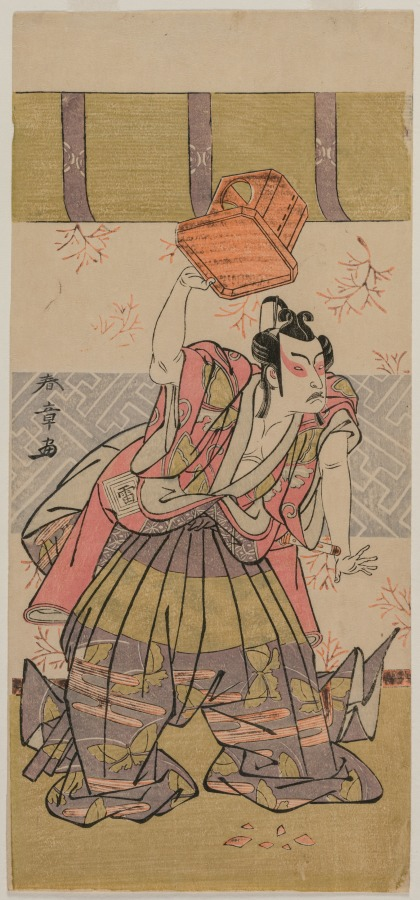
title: The Actor Ichikawa Raizo as Soga No Goro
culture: Japan, Edo period (1615–1868)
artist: Katsukawa Shunshō (Japanese, 1726–1792)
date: mid-1770s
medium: color woodblock print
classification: Print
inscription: Signed middle left; title on actor's costume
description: Soga No Goro was the hero of a play dealing with the revenge of the Soga brothers upon the slayer of their father.